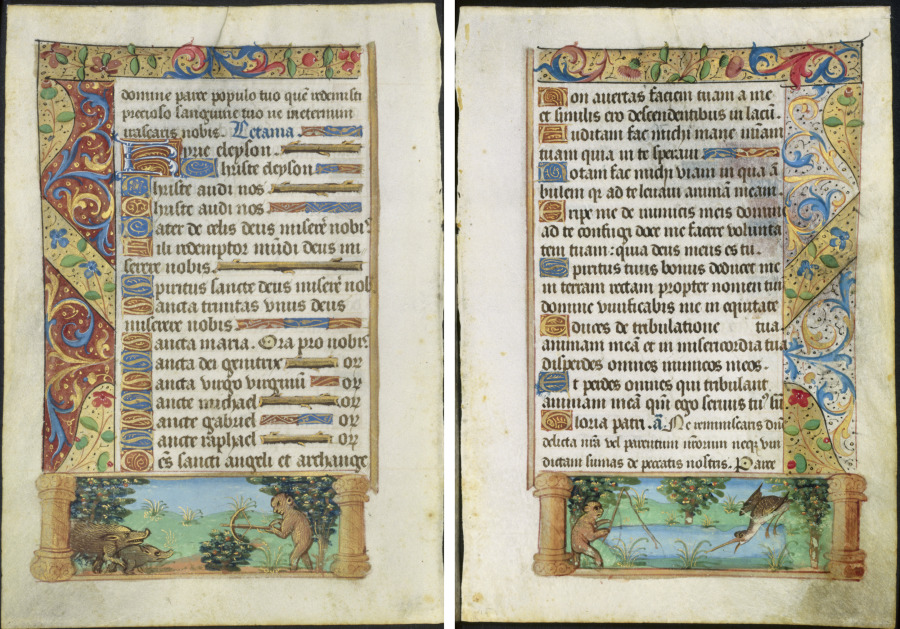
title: Leaf from a Book of Hours: Ape Hunting Wild Boars (recto) and Ape Fishing (verso)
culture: France, Paris or Rouen, 16th century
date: c. 1500–1510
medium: ink, tempera and liquid gold on vellum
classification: Manuscript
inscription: Letania Kyrie eleyson. Christe eleison. Christe audi nos. Christe audi nos. Pater de caelis Deus, miserere nobis. Spiritus sancta Deus, miserere nobis. Sancta Trinitas unus Deus, miserere nobis. Sancta Maria, ora pro nobis. Sancta Dei genitrix, ON. Sancta virgo virginum. ON. Sancte Michael, ON. Sancte Gabriel ON. Sancte Raphael ON. Oes sancti angeli et archangeli…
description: The litany of the saints is among the most ancient and emotional Christian liturgical texts, dating in the West to at least the AD 400s. In a book of hours, the litanies is a list of saints’ names expressed in hierarchical order and individual rank. These names were recited rhythmically as invocations, followed each time by Ora pro nobis (Pray for us). In this way, saints were called upon by sinners seeking forgiveness and salvation. The bas-de-page (lower margin), features an ape hunting wild boars: both animals were symbolic of vice and lust. Perhaps deriving from a fable, the scene could be amusing or diversionary, but it was likely instructive for the medieval owner of the book.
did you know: The ape and the wild boar symbolized vice in general and lust in particular during the Middle Ages.